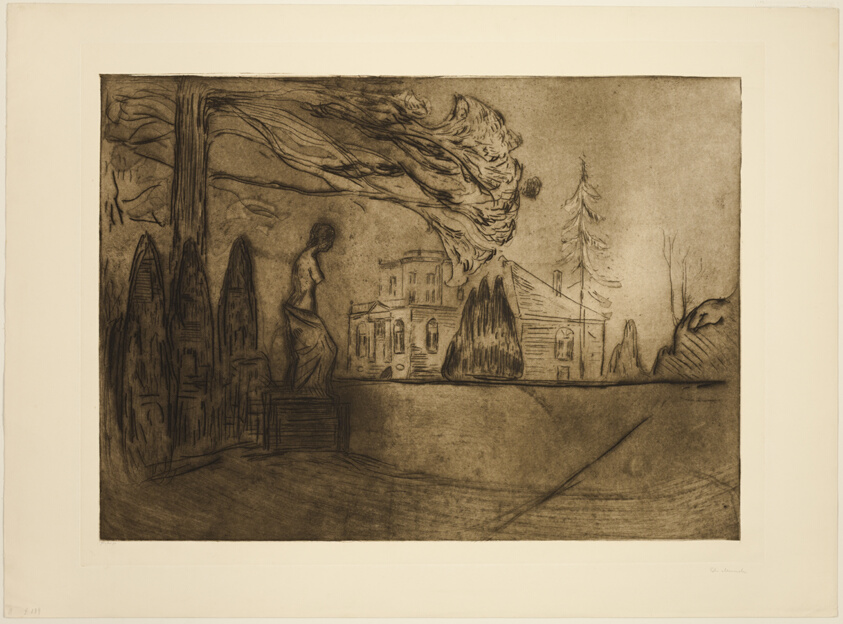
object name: Print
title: The Garden at Night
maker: Edvard Munch (Norwegian, 1863-1944); printed by Otto Felsing (German, born 1854)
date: 1902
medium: Etching, drypoint, and aquatint on paper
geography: Norway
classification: etching; print; prints and drawing